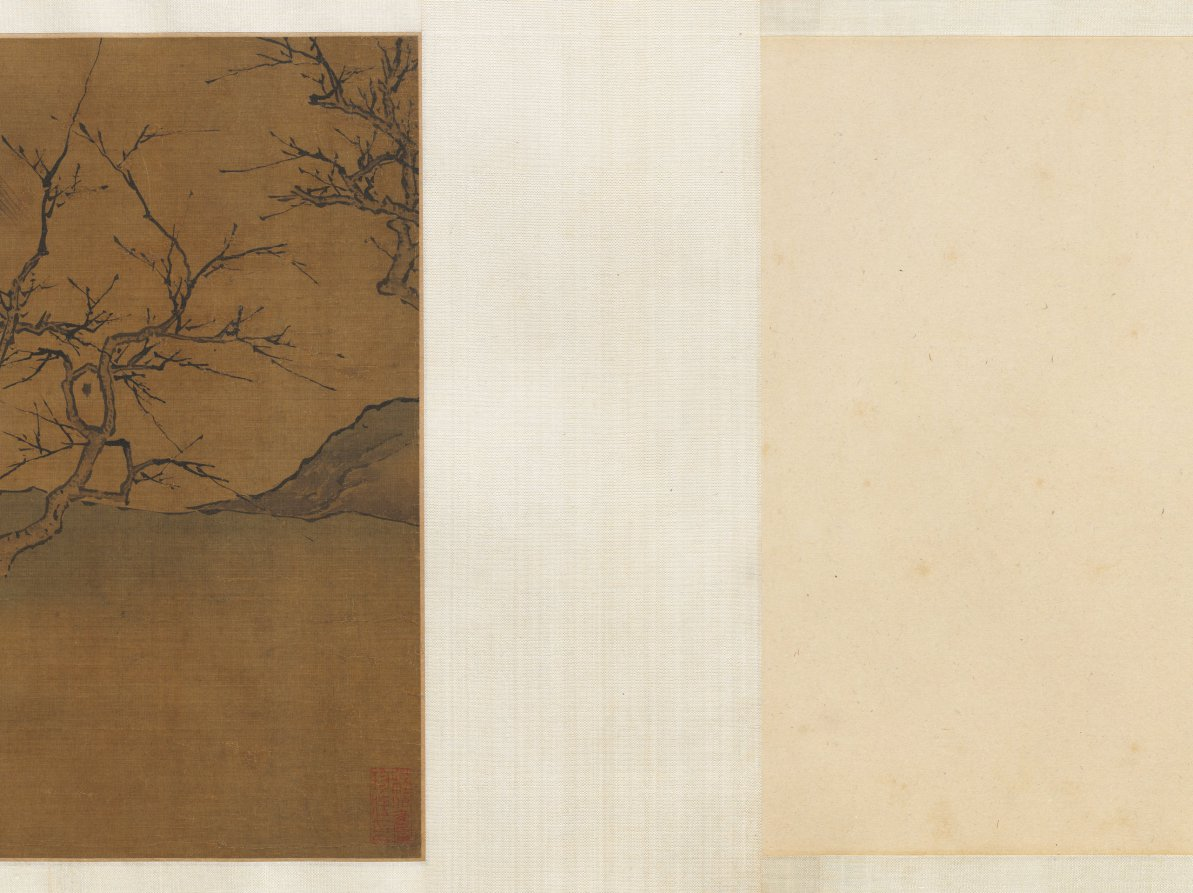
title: Sericulture (The Process of Making Silk)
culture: China, Southern Song dynasty (1127-1279)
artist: attributed to Liang Kai (Chinese, mid-1100s–early 1200s)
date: early 1200s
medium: Handscroll; ink and color on silk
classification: Painting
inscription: 3 colophons and 7 seals of Ch'eng Ch'i (20th c.).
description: By the Southern Song period, the economic center of the silk industry had shifted to the lower Yangzi delta, while the north continued to be troubled by wars. Divided into three sections, the handscroll illustrates 14 steps in the process of making silk, from the raising of silkworms to the weaving of silk cloth. The scroll’s scenes follow the illustrations of Lou Shou’s (1090–1162) Pictures of Tilling and Weaving (gengzhi tu), the first recorded painting of this genre, which was conceived in Hangzhou around 1145. However, in the Cleveland painting the artist groups several scenes of sericulture together under the roof of an open structure.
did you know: The painting is attributed to Liang Kai, a court artist active from about 1201 to 1204 at the Imperial Painting Academy in the city of Hangzhou, a major silk weaving center from that time to the present day.